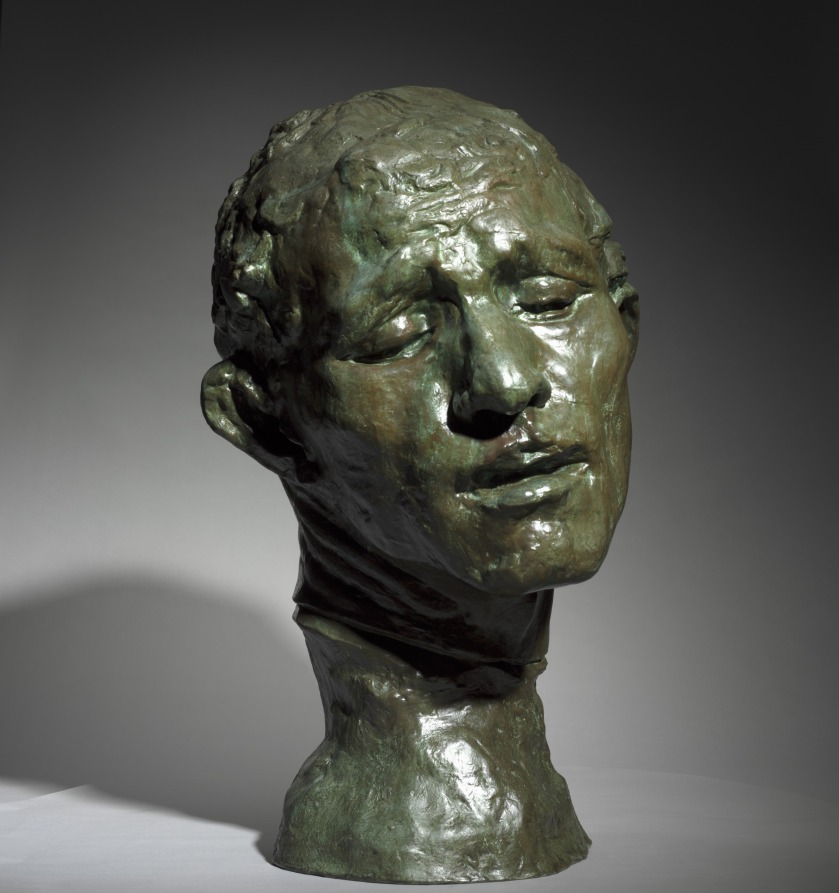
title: Heroic Head of Pierre de Wissant, One of the Burghers of Calais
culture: France, 19th century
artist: Auguste Rodin (French, 1840–1917)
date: 1886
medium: bronze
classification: Sculpture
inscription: inscribed at neck, left: A.Rodin; inscribed lower back: Alexis Rudier/Fondeur-Paris.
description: This sculpture depicts one of the figures in Rodin’s large public monument The Burghers of Calais (1884–89), featuring six French men who volunteered to be taken prisoner by the English in exchange for lifting the siege of Calais during the Hundred Years War (1337–1453). Pierre de Wissant’s anguished expression suggests extreme mental suffering as he contemplates his expected execution. Rodin exhibited a life-size version of the figure as an independent work before completing the monument. He later made multiple versions in various sizes and media.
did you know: This sculpture depicts the head of a figure from Rodin's large public monument The Burghers of Calais (1884-89). The CMA also owns a plaster version of the head.